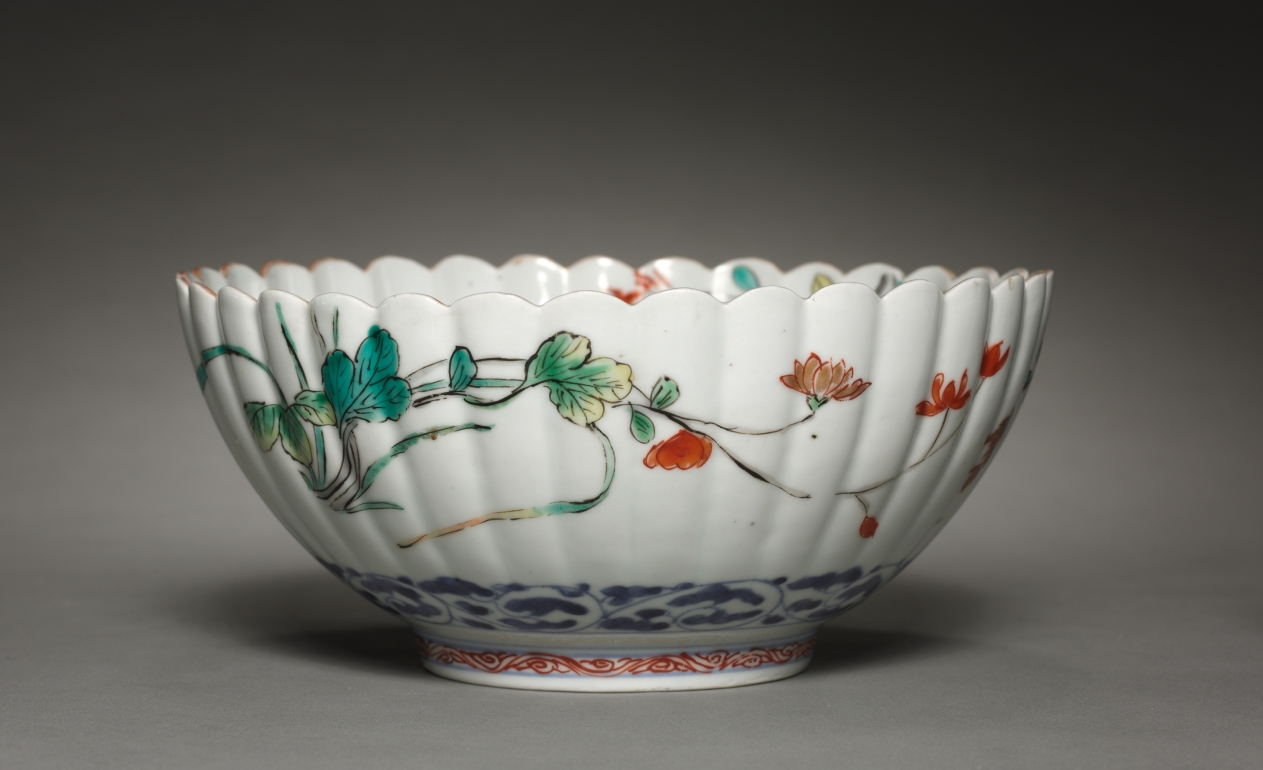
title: Fluted Bowl with Dragon, Butterfly, and Flowers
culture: Japan, Edo period (1615–1868)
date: early 1700s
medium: Porcelain with underglaze blue and overglaze color enamels and gold (Hizen ware, Kakiemon type)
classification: Ceramic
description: A dragon encircled by sprays of flowers and a butterfly enliven the interior of this fluted bowl. The exterior has similar decoration, with touches of gold on some petals. The flutes enhance both the visual and tactile experience; their tapered forms draw the eye from the edges inward and provide ridges for the hands.